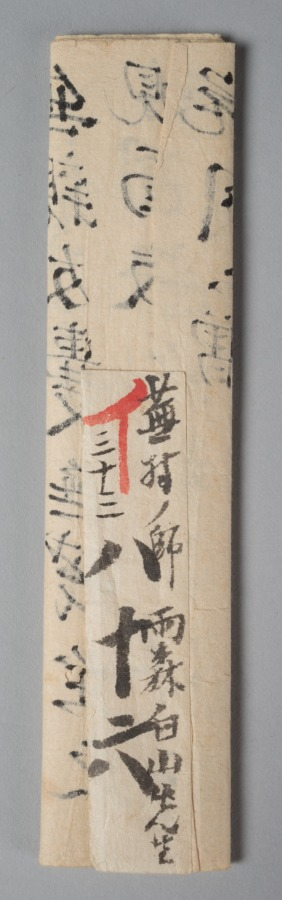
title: Happy Forest, from Water Margin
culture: Japan, Edo period (1615–1868)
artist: Matsumura Goshun (Japanese, 1752–1811)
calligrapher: and Amenomori Shōteki (Japanese, 1731–1786)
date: late 1700s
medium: hanging scroll; ink and color on paper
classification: Painting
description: The Chinese literary classic Water Margin is set in the 1120s and tells the story of 108 outlaws who first rebel against the government and then join forces with it. This painting depicts an episode in which hero Wu Song reclaims the tavern Happy Forest for its rightful owner, the prison warden’s son, Shi En. To prepare for the fight, Wu Song drinks a lot of wine. The painting was inscribed with a quote in which an ally describes Wu Song’s fighting style. It reads as follows: Where his twin fists rise, clouds and thunder roar, When his flying kick comes, wind and rain tremble.